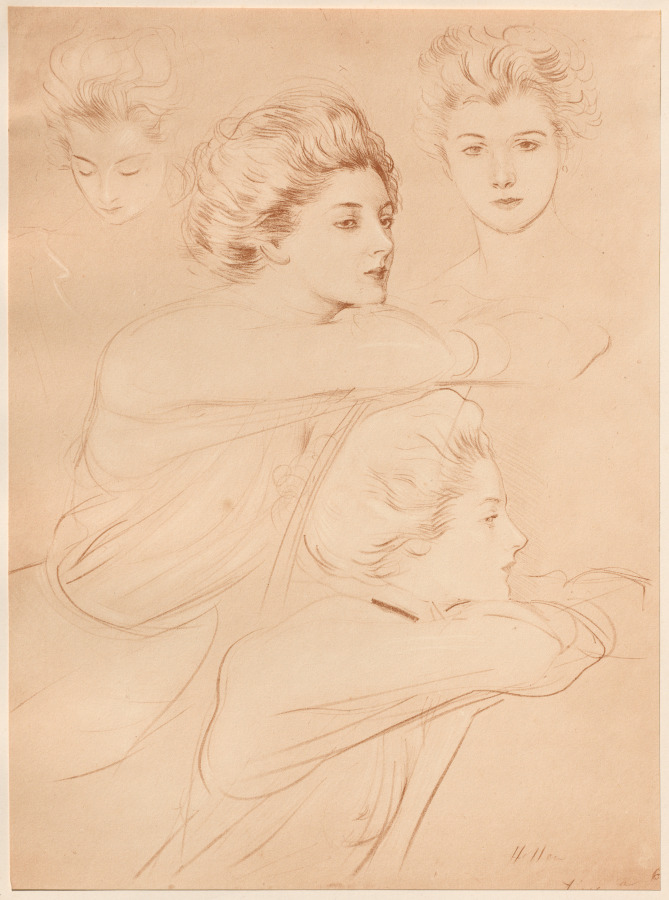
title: Parisienne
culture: France, Paris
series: L'Estampe Moderne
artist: Paul César Helleu (French, 1859–1927)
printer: Imprimerie Champenois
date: 1898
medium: Color lithograph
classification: Bound Volume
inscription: In plate: lower right corner of image: Helleu; lower right corner of secondary support: blindstamp of l'Estampe Moderne (Lugt 2790)